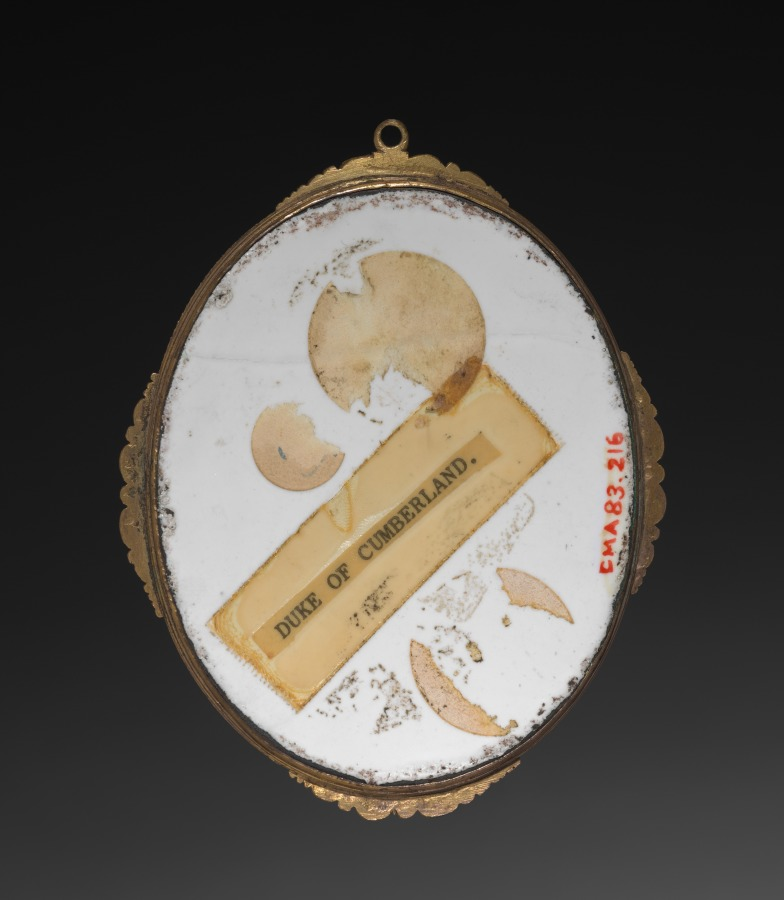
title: Portrait Miniature of Prince William Augustus, Duke of Cumberland (1721-1765)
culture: England, Battersea, 18th century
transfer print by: Simon François Ravenet (French, 1706–1774)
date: c. 1755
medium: enamel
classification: Enamel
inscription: signed beneath shoulder: RaveneT Ft.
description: This portrait miniature depicts Prince William Augustus, the Duke of Cumberland and the youngest son of King George II. During his lifetime, the prince was greatly admired for his role in putting down the Jacobite Rising and defeating Prince Charles at the Battle of Culloden in 1746. Accordingly, he is depicted here in profile wearing a steel breastplate or cuirass, a fur cloak, and armor depicting a lion’s head along his shoulder. These characteristics suggest that the work was inspired by a series of medals produced in the mid-1740s celebrating the history of Great Britain and Ireland.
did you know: The lion head depicted on the prince’s shoulder is a symbol of Great Britain.